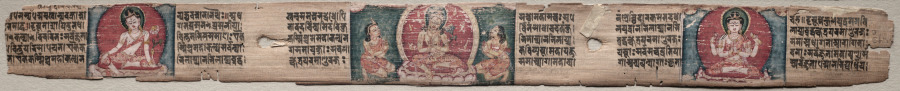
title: Bodhisattva Manjushri with two forms of Avalokiteshvara, folio 348 (recto) from a Gandavyuha-sutra (Scripture of the Supreme Array)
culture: Nepal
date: 1000–1100s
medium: gum tempera and ink on palm leaf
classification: Painting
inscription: >> dharmamukhānyavakrāntānyabhūvan nānānayaiḥ // atha khalu samantabhadro bodhisattvo mahāsattvaḥ sudhanaṃ śreṣṭhidārakametadavocat - dṛṣṭaṃ te kulaputra mama vikurvitam? āha - dṛṣṭamārya / api tu tathāgataḥ prajānan prajānīyāttāvadacintyamidaṃ vikurvitam / so 'vocat - ahaṃ kulaputra anabhilāpyānabhilāpyabuddhakṣetraparamāṇurajaḥsamān kalpān vicaritaḥ sarvajñatācittamabhilaṣamāṇaḥ / ekaikasmiṃśca mahākalpe 'nabhilāpyānabhilāpyabuddhakṣetraparamāṇurajaḥsamāstathāgatā ārāgitā bodhicittaṃ pariśodhayatā / ekaikasmiṃśca mahākalpe sarvatyāgasamāyuktāḥ sarvalokavighuṣṭā mahāyajñā yaṣṭāḥ / sarvasattvapratipādanā sarvajñatāpuṇyasaṃbhāratā / ekaikasmiṃśca mahākalpe anabhilāpyānabhilāpyabuddhakṣetraparamāṇurajaḥsamāstyāgā (Gv 426) mahātyāgāḥ kṛtāḥ, atyarthatyāgāḥ kṛtāḥ sarvajñatādharmānabhiprārthayatā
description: The Bodhisattvas of Wisdom and Compassion sit in majesty, with Manjushri in the preaching gesture in the center, being honored by two worshipers. His mandorla dances with flames, and tongues of flames encircle its border. Two different forms of Avalokiteshvara are in the flanking paintings, a two-armed and a four-armed form.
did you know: A book on a blue lotus is just over the left shoulder of the Bodhisattva of Wisdom, Manjushri.